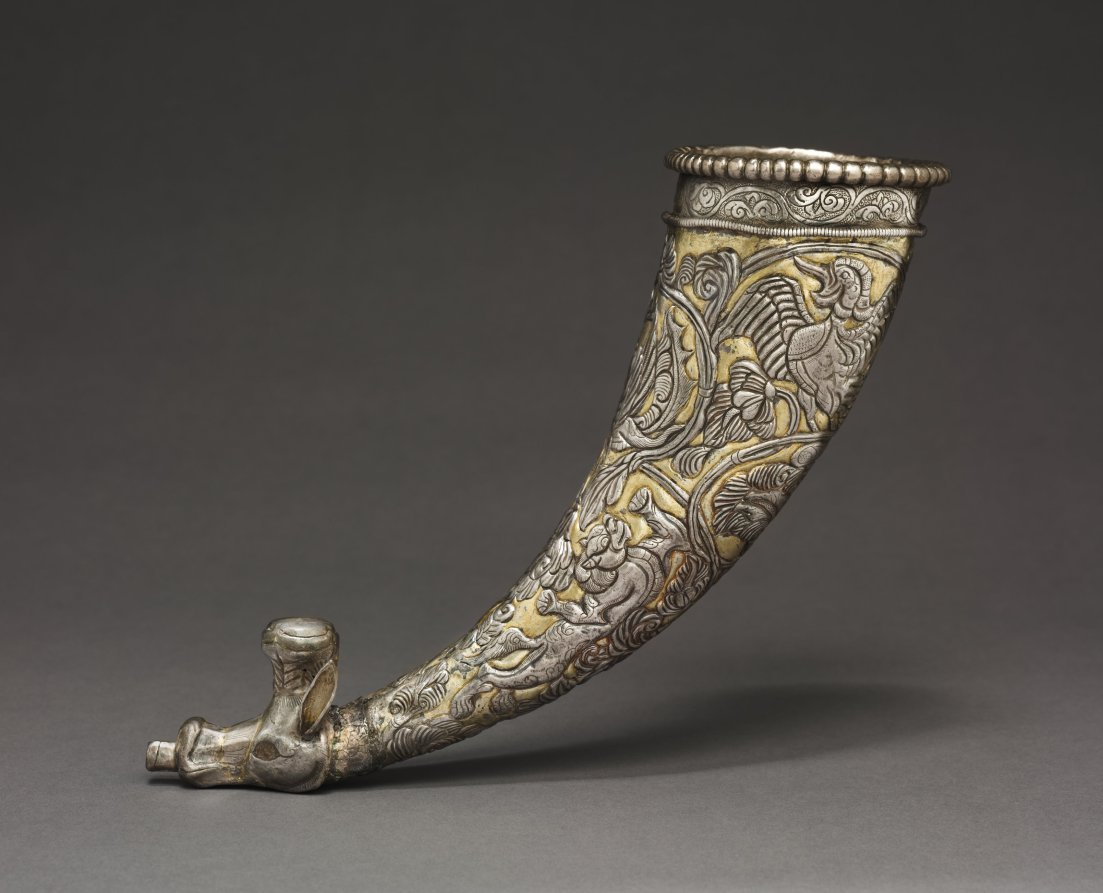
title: Rhyton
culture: Central Asia (Sogdiana) or Tibet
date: c. late 600s–early 700s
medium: silver with gilded foil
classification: Silver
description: The form of the animal-headed rhyton as a drinking vessel and the use of silver are evidence of cultural exchange with Persia, while the lush, luxurious quality of the design and the form of the lions and curling dragon on one side of the decanter reveal an awareness of Chinese forms. Poured into the large opening at the top of the horn, wine then flowed out through the small tube held between the parted lips of a bovine-like animal. To keep from spilling, drinkers could stop the flow of the liquid by holding a thumb over the lower aperture.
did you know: This drinking horn was a communal vessel which guests would pass around to share wine at parties.